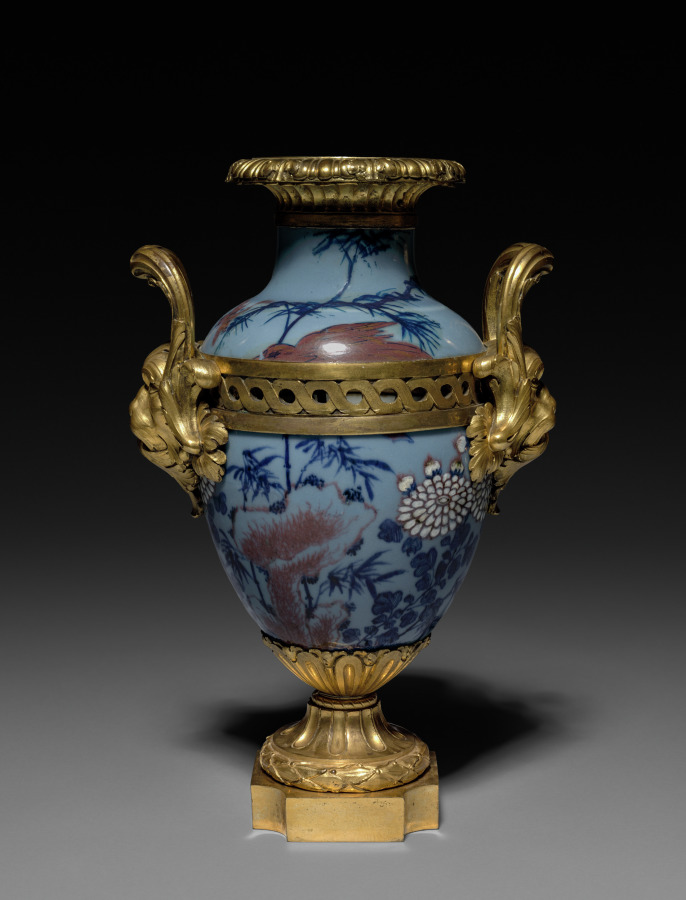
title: Vase for a Garniture Set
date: 1736–1770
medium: Chinese hard-paste porcelain, gilt bronze, enameled metal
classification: Furniture and woodwork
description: The fascination with Chinese porcelain among aristocratic circles increased during the reign of Louis XV. In reaction to the perceived excesses of elaborate naturalistic ornament of the 1750s, mount makers increasingly turned to neoclassical designs, known as Goût Grec (Greek taste) in the 1760s and 1770s. These beautifully chased gilt-bronze mounts feature classical Greco-Roman motifs such as lion masks, acanthus and laurel leaves, and pilasters.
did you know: A set of vases and clock, connected visually by the use of the same materials, often adorned a mantlepiece or the top of a large piece of furniture, such as a commode or console, within a room.